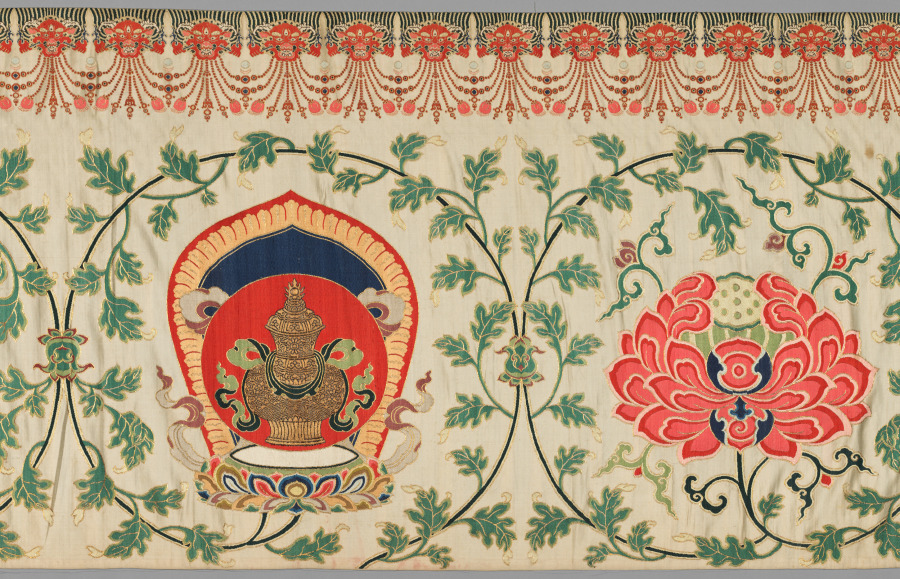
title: Brocaded Strip, known as "Imperial Tribute Brocade"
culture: China, Qing dynasty (1644-1911)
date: c. 1770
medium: brocaded satin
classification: Textile